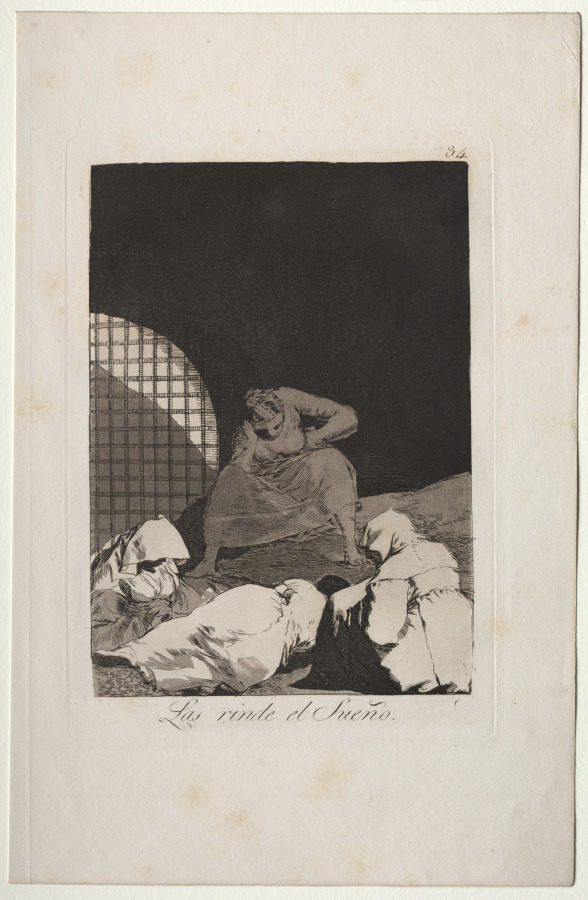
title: Sleep Overcomes Them, Plate 34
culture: Spain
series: Los Caprichos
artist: Francisco de Goya (Spanish, 1746–1828)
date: 1799 (printed c. 1855)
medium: etching and aquatint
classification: Print